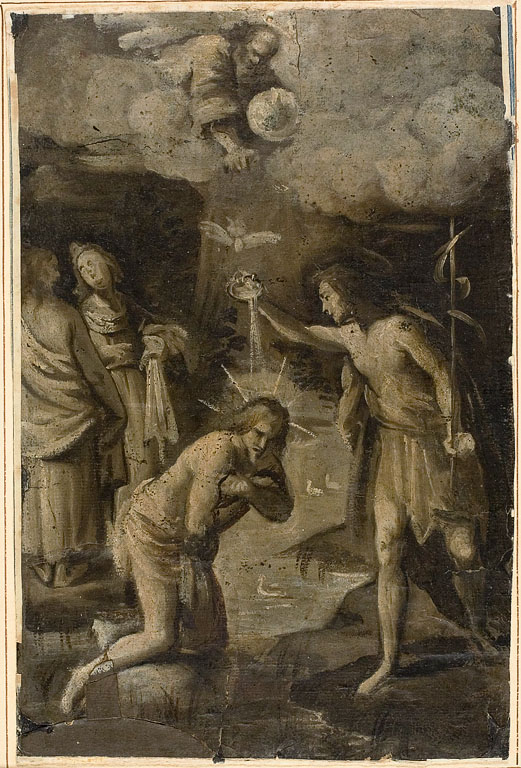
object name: Drawing and Watercolor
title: Baptism of Christ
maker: Attributed to Rutilio Manetti; Italian, 1571-1639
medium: Brush and oil paint on tan laid paper, laid down on cream laid paper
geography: Italy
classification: oil paintings (visual works); drawings (visual works); prints and drawing